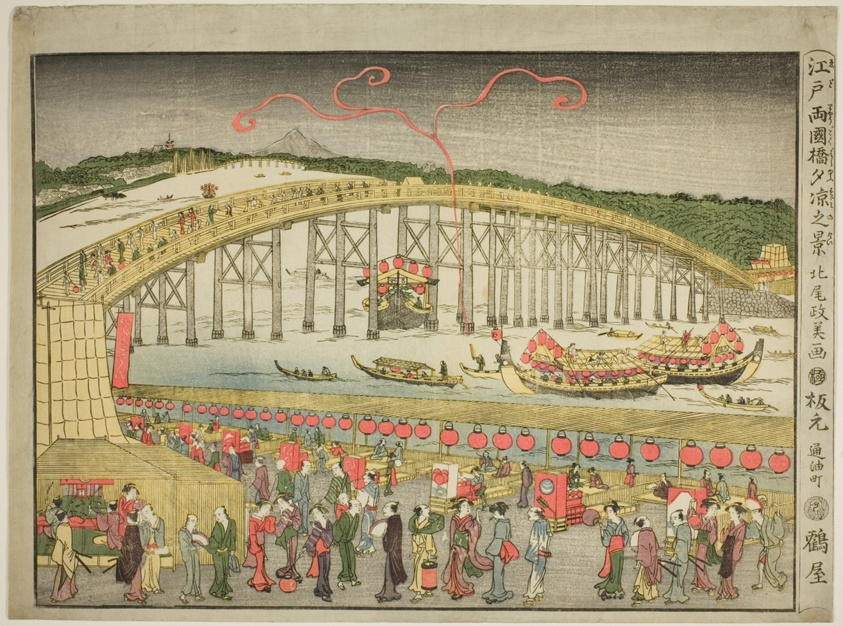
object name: Print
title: Enjoying the Evening Cool at Ryôgoku Bridge in Edo (Edo Ryogokubashi yusuzumi no kei)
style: Japanese (culture or style)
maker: Kitao Masayoshi; Japanese, 1764–1824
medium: Color woodblock print, horizontal ô-ôban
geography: Japan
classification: woodblock print; print; asian art